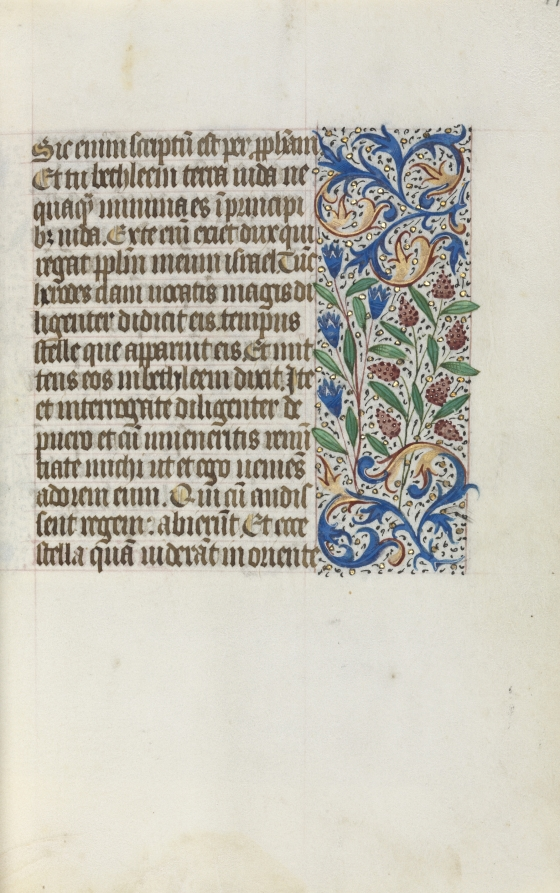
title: Book of Hours (Use of Rouen): fol. 17r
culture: France, Rouen, 15th century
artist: Master of the Geneva Latini (French, active Rouen, 1460–80)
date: c. 1470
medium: ink, tempera, and gold on vellum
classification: Bound Volume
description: In the late 1400s and early 1500s Rouen was an established and important center of book production. The city’s cathedral had a wealthy chapter that spent large sums of money to commission books and to maintain its extensive library. The stationers and booksellers would have likely been concentrated in or near the cathedral precinct. This artist, named after a manuscript now in Geneva, was Rouen’s principal illuminator during the second half of the 1400s.